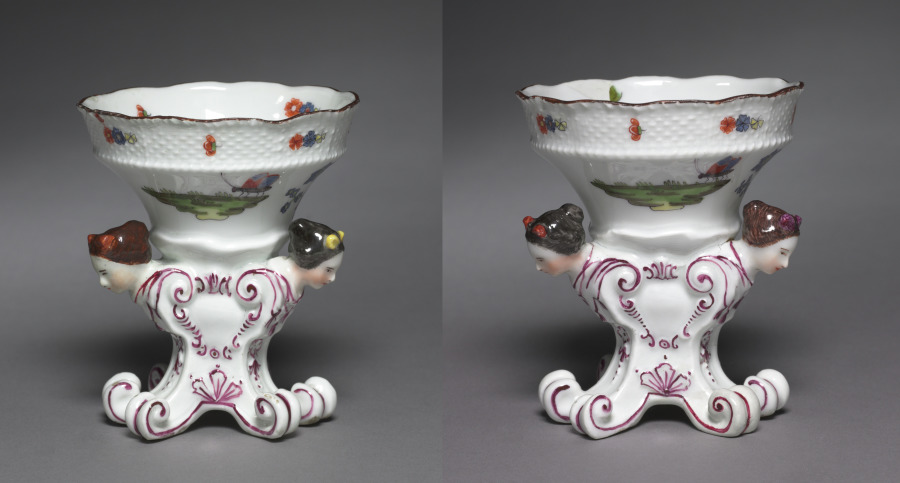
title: Pair of Salt Cellars from the Sulkowsky Service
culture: Germany, Meissen, 18th century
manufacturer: Meissen Porcelain Factory (German, est. c. 1710)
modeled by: Johann Friedrich Eberlein (German, 1696–1749)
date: c. 1736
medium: hard-paste porcelain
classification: Ceramic